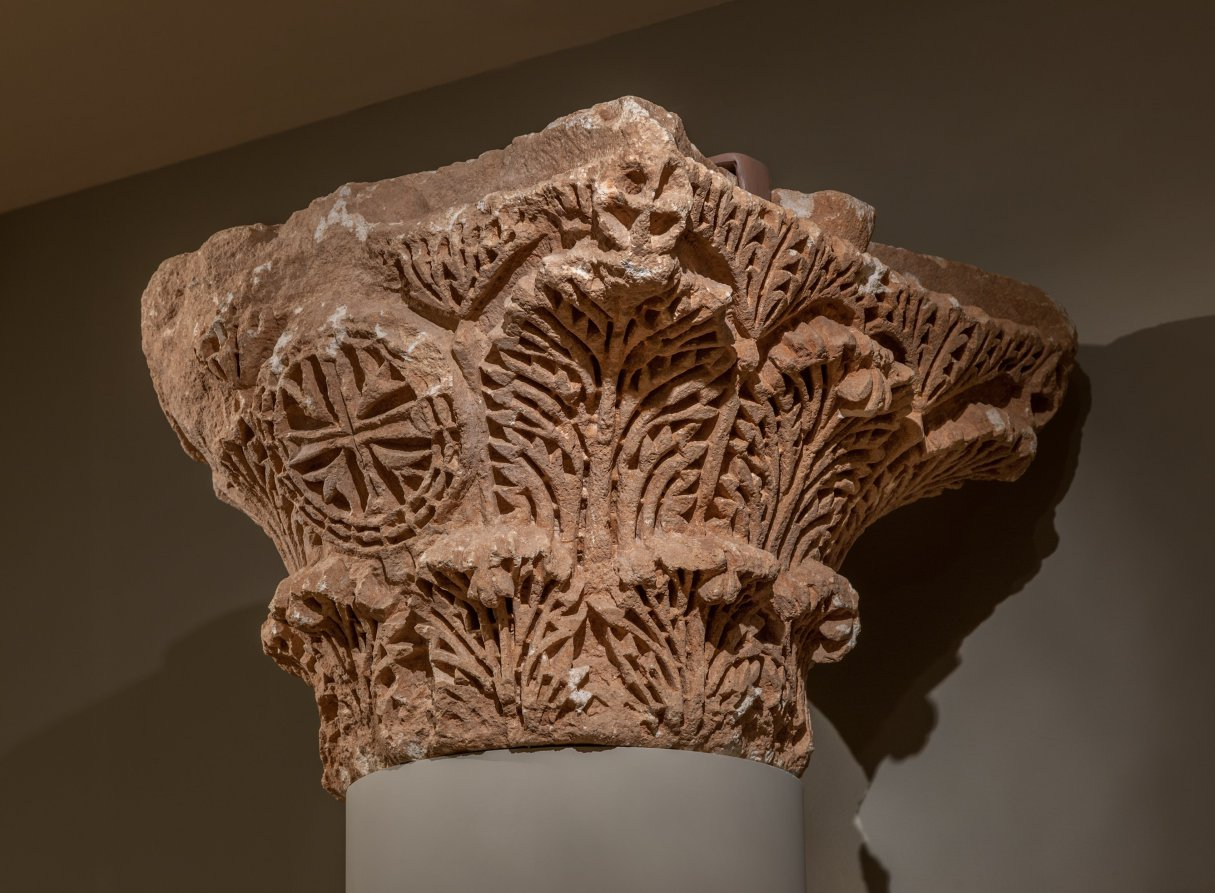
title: Capital with Acanthus and Crosses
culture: Byzantium, Northern Syria, Byzantine period, 5th century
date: 400s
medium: limestone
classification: Sculpture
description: These capitals - the Capital with Acanthus and Crosses and the Engaged Capital with Windblown Acanthus - may have been found in Northern Syria and presumably come from a large and important church. Both capitals are decorated with leaves of acanthus, a fleshy plant with jagged leaves native to the Mediterranean area. One capital is symmetrical with crosses in its ornament, the other is asymmetrical and gives the impression of windblown leaves.